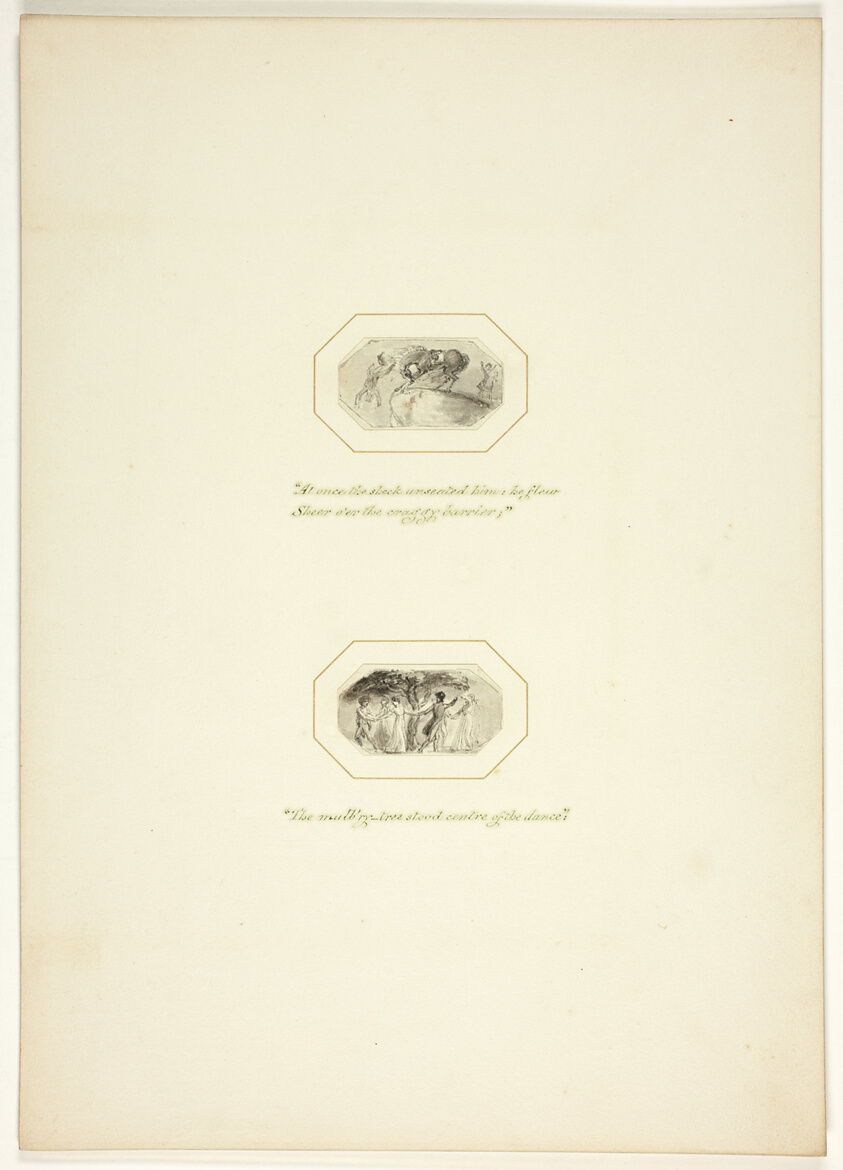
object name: Drawing and Watercolor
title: Study for a plate from The Task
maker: Thomas Stothard (English, 1755-1834)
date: c. 1800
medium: Ink wash on paper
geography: England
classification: ink or chalk wash; drawings (visual works); prints and drawing